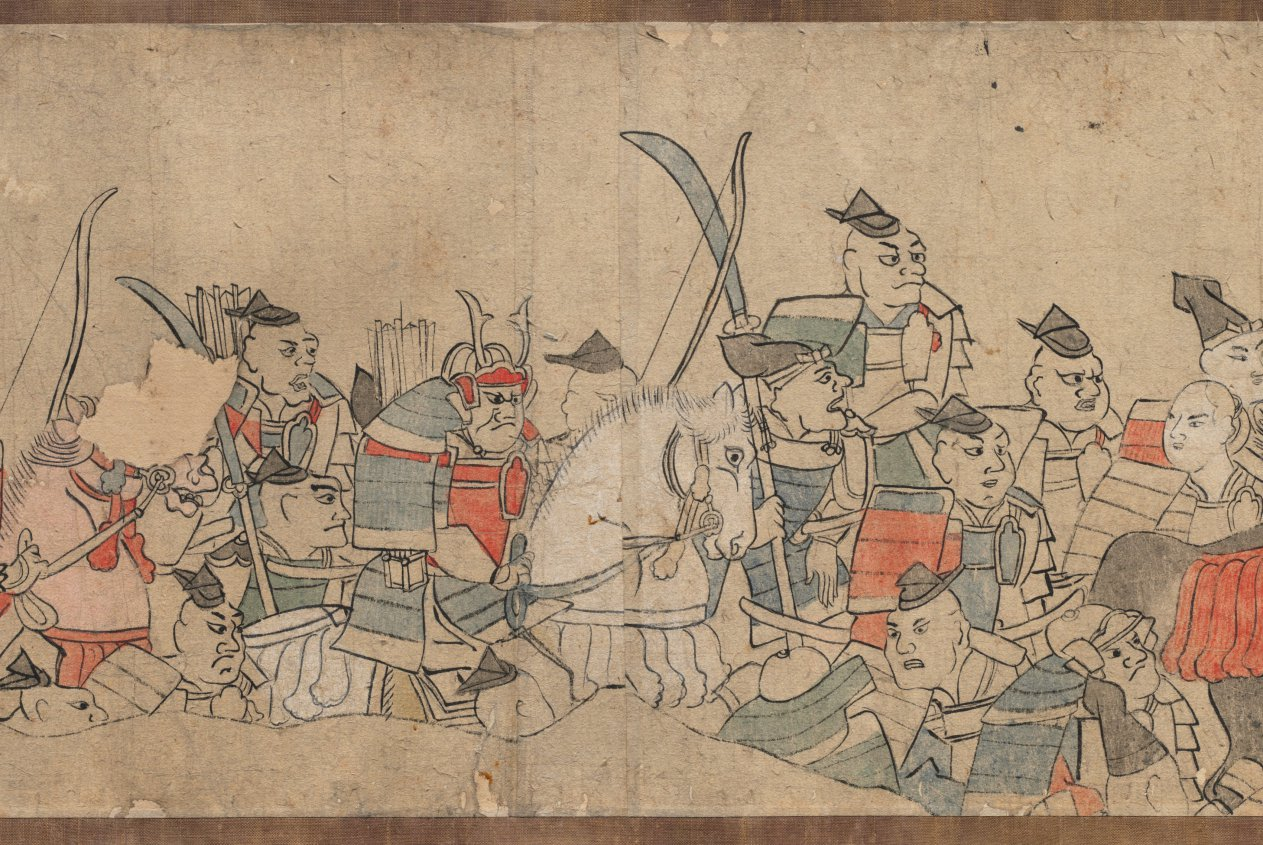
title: Oeyama Engi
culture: Japan, Edo period (1615–1868)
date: 1615–1868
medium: one of a pair of handscrolls; ink and color on paper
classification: Painting